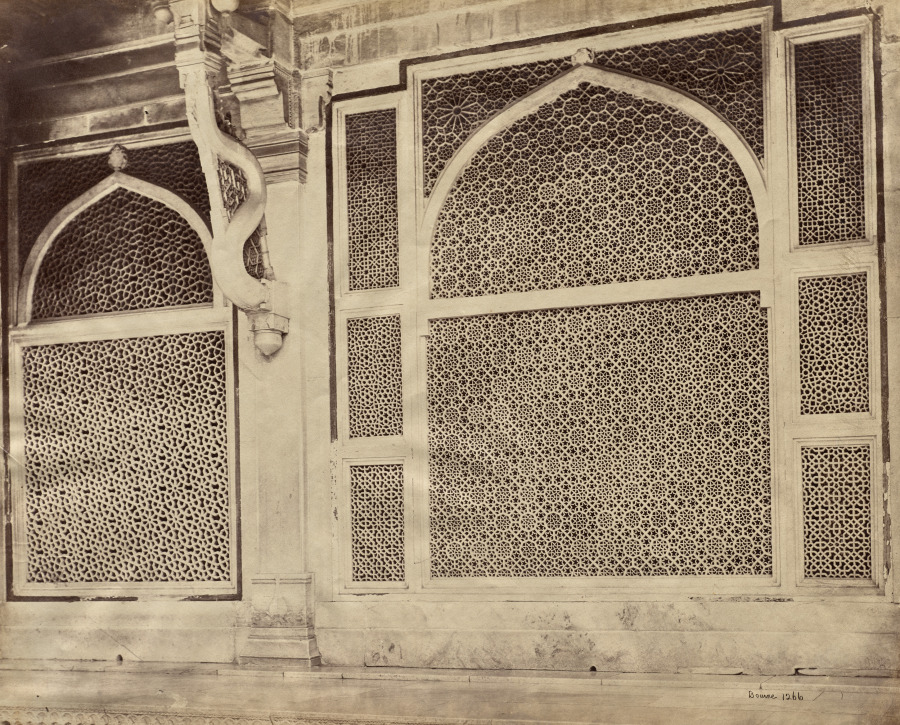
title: Futtypore Sikri—Two of the Marbled Screens in the Tomb of Sheik Selim Chisti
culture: India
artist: Samuel Bourne (British, 1834–1912)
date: 1866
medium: albumen print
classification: Photograph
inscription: Inscription at bottom right: "Bourne 1266"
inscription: Embossed mark at center right edge corresponding to “watermark” on the left edge of verso, RJK Ri… No 72 (?).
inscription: Graphite inscription on verso: "1266"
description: These elaborate screens decorate the mausoleum of the Sufi saint Salim Chisti (1478-1572). The building, considered one of the finest examples of Mughal architecture in India, was built in 1580-1581 by the Emperor Akbar to honor the saint, whose prayers he believed had guaranteed the birth of male heirs to the throne.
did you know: Carved marble screens provided not just decoration but also light and air to interiors, while keeping out sun glare and prying eyes.